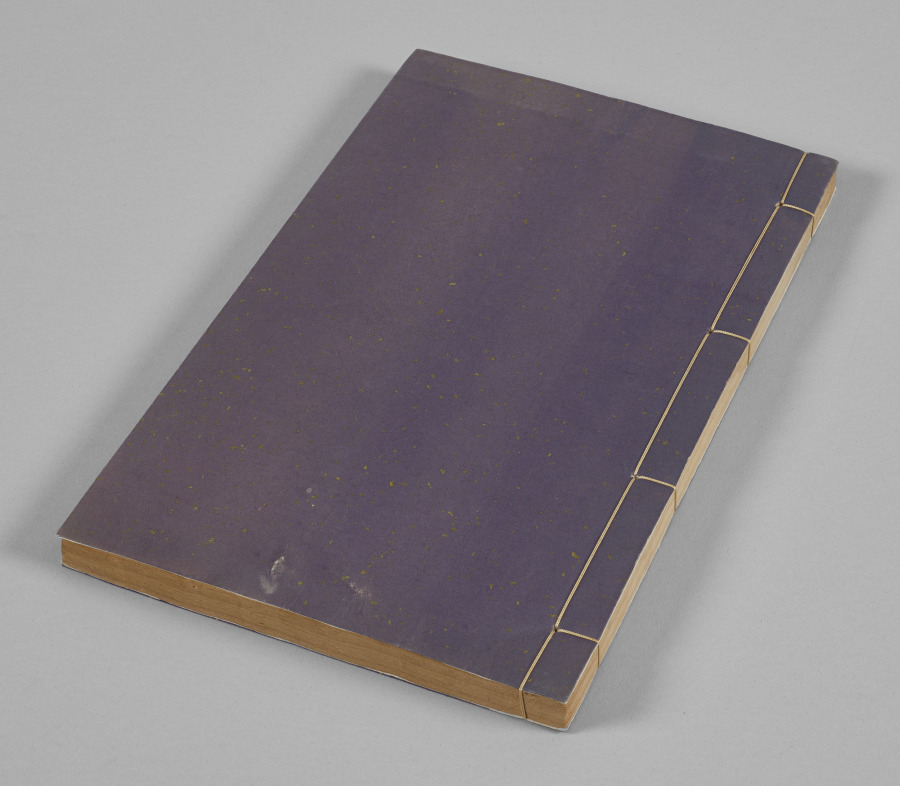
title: Yu-hai (The Ocean of Jade)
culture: China, Ming dynasty (1368–1644)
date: 1368–1644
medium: woodblock-printed book with painted edges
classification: Bound Volume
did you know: When each book is rolled to form a cylinder, a landscape appears on the edges, painted in ink and washes of color.